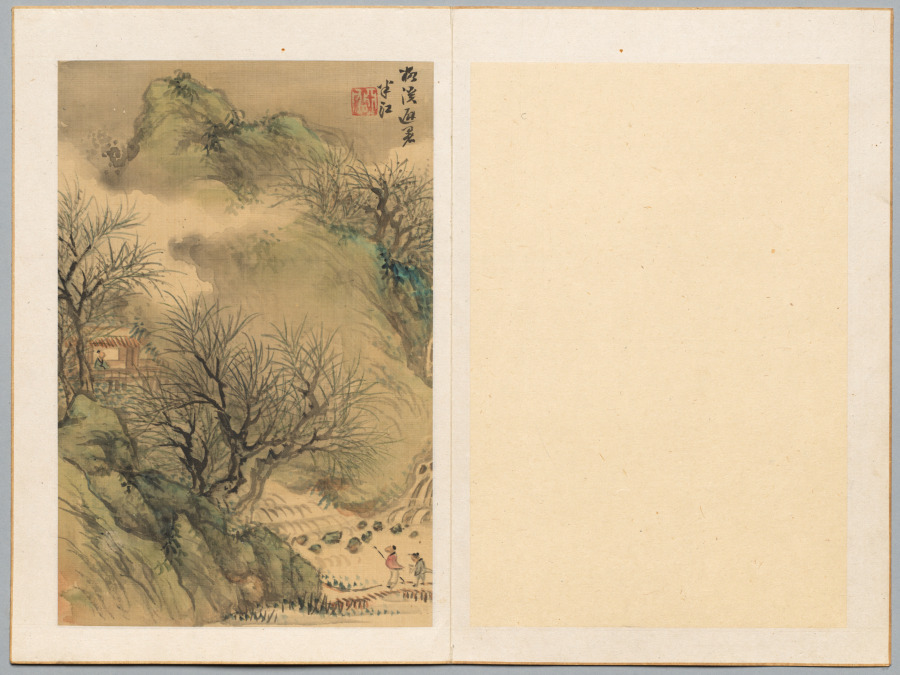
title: Summer Retreat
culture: Japan, Edo period (1615–1868)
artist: Okada Hankō (Japanese, 1782–1845)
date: early to mid-1800s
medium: leaf from a pair of folding albums; ink and light color on paper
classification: Portfolio